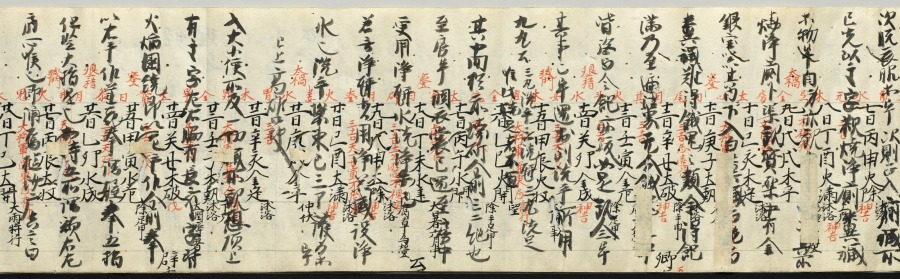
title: Scroll of Miscellaneous Notes written on a Calendar by Priest Seigen (verso)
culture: Japan, Kamakura period (1185–1333)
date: c. 1200–1231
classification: Manuscript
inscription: bears miscellaneous notes written by Priest Seigen.